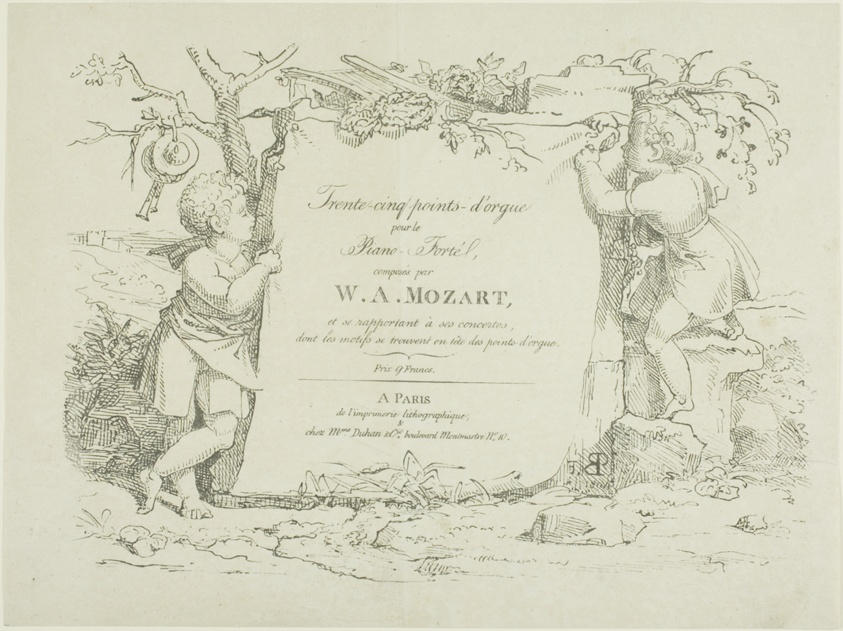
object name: Print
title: Sheet Music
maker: Pierre Nolasque Bergeret (French, 1782-1863)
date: 1804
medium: Lithograph on paper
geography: France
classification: lithograph; print; prints and drawing